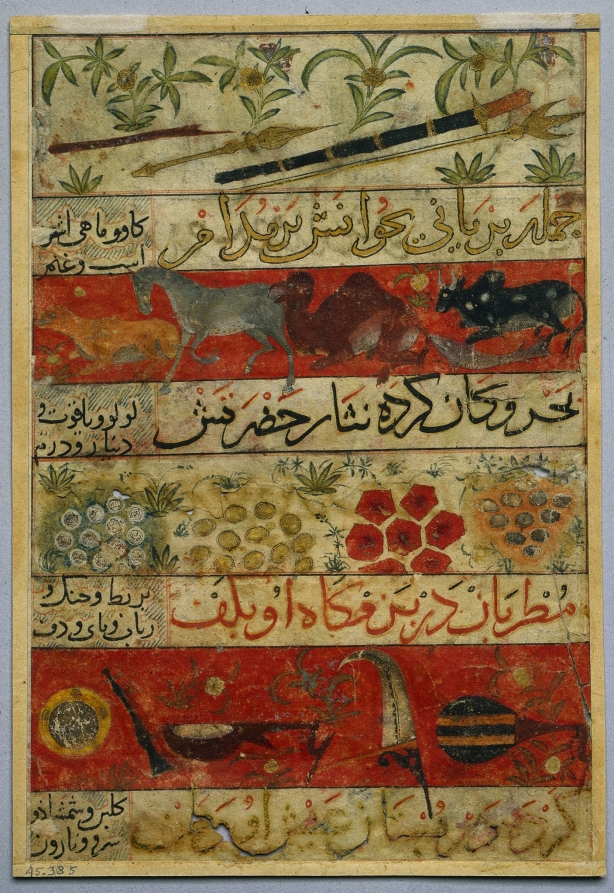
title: Animals, Precious Stones, Coins, and Musical Instruments (recto); Animals, Birds, and Plants (verso) from a Mu'nis al-Ahrar fi Daqa'iq al-Ash'ar (The Free Men's Companion to the Subtleties of Poems) of Muhammad Ibn Badr al-Din Jajarmi (active 1340s)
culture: Iran, Shiraz, Ilkhanid period (1256-1353)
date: c. 1341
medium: opaque watercolor, ink, and gold on paper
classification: Manuscript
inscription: Script: Thulth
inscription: (text on the previous page, leaf 2f, Harvard University Art Museums, 1960.186) In the hands of his slaves and of his friends are:/ Spear and sword, javelin and pen./ Ever all roasted at his table are:/ Ox and fish, camel and horse and sheep./ Ocean and mine have showered on his presence:/ Pearl and ruby, coined gold and silver/ The minstrels at his banquet bear in their hands:/ Lute and harp, rebec, pipe and tambourine./ Making the garden of his pleasure their homeland are:/ Rosebush and box-tree, cypress and elm./ Prey to hawk and prey to his cheetah are:/ Vulture and sīmurgh, elephant and rhinoceros./ Sun and Moon, Venus and Mercury are at his feast:/ Falcon-drum and goblet, bowl and candlestick./ Overwhelming the corpses of his foes are:/ Porcupine and stork, raven and kite.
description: This is one of several pages that were removed from a unique manuscript of this otherwise unknown work, which bears a colophon stating that it was written by the author and finished "Ramadan, 741" (February 1341). Illustrations on both sides include various animals, trees, and objects such as weapons, musical instruments, and jewels.